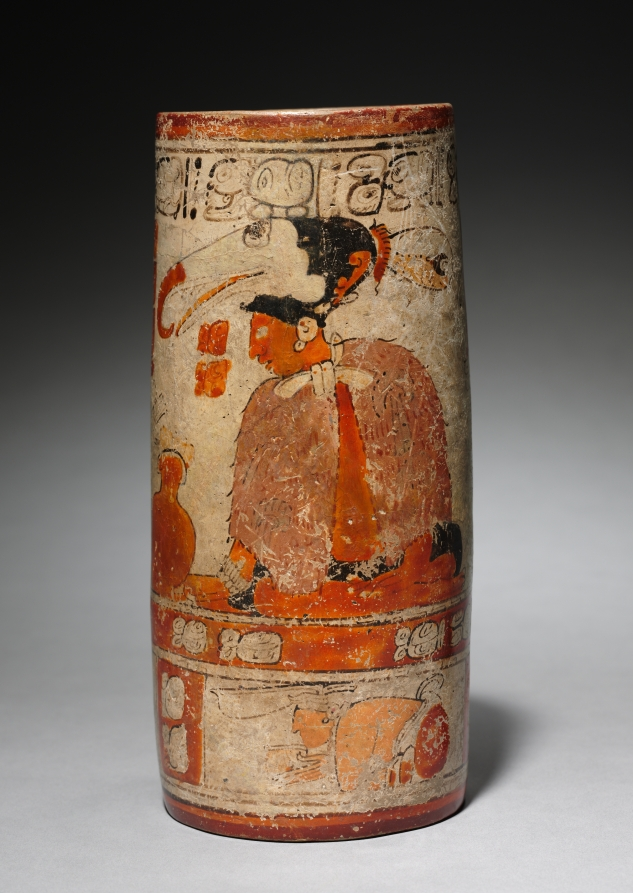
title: Painted Vase with Ruler and Scribe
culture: Guatemala, Northern Peten or Mexico, Southern Campeche, Maya, late Classic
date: 600–900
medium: pottery with burnished, colored slips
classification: Ceramic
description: Among Maya noble families, finely painted ceramic vessels were used as fancy tableware, treasured gifts that secured the support of allies, and funerary offerings placed in tombs. Accordingly, the vessels’ imagery varies from religious themes to scenes of courtly life. Here, two attendants kneel before an enthroned nobleman who wears an enormous bird-head headdress.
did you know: A string of death glyphs below the rim departs from the Primary Standard Sequence.